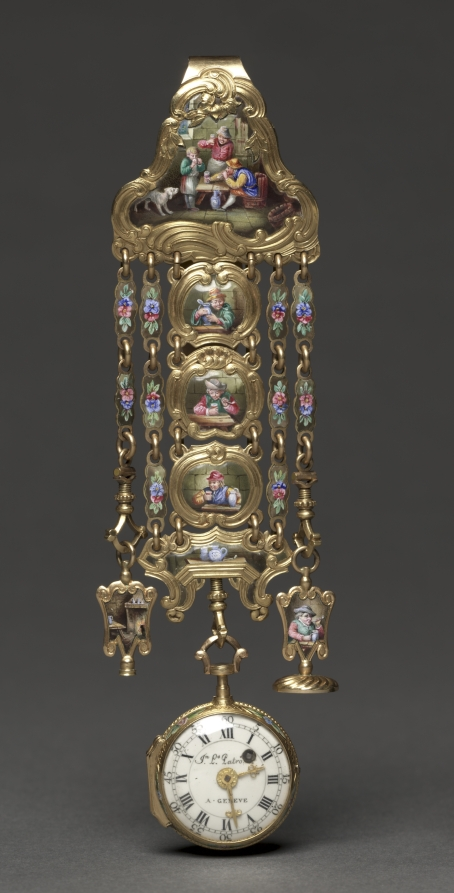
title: Chatelaine Watch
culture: Switzerland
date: mid 1800s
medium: metal and enamel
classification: Jewelry